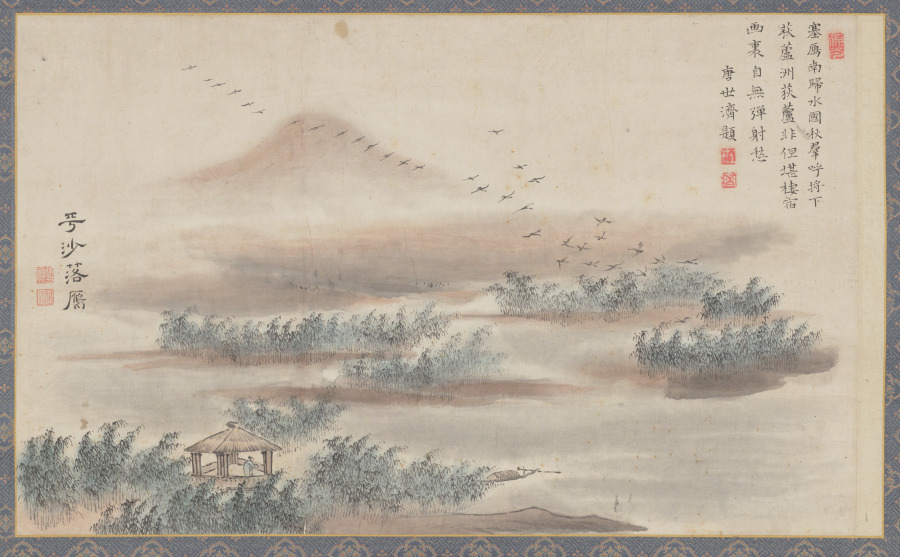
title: Wild Geese Descending on a Sandbar, from Eight Views of Xiao-Xiang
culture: Japan, Edo period (1615–1868)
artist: Tani Bunchō (Japanese, 1763–1841)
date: 1788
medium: album leaf remounted as a hanging scroll; ink and color on paper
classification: Painting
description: This painting was part of a set of album leaves representing the Eight Views of Xiao-Xiang, a theme originating in Chinese poetry and painting that spread to both Korea and Japan. Southern China’s Xiao-Xiang area, where the mist-covered banks of the Xiang River created a complex landscape shifting like the moods and minds of people, captured the imaginations of generations of painters and calligraphers. Inscriptions on these works suggest that they were possibly ordered by newly prominent Japanese Confucian scholars.